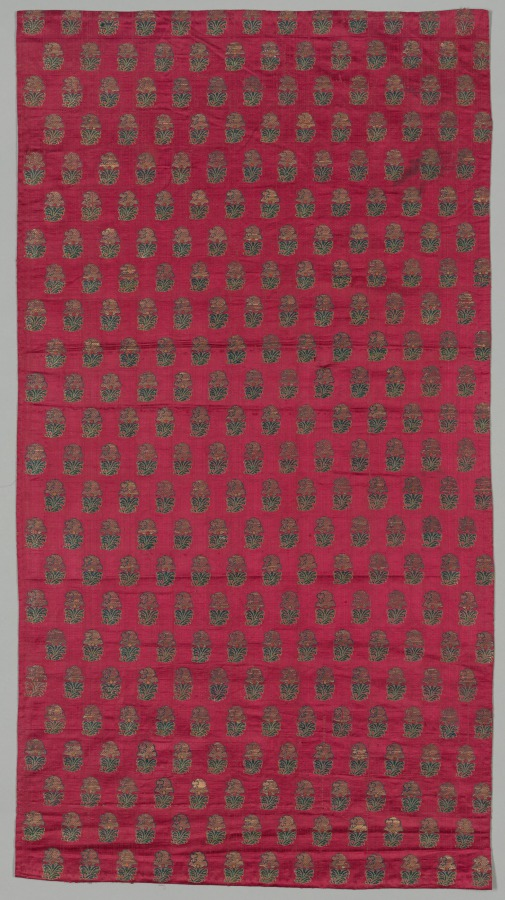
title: Fragment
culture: India, Warangal or Gulbarga, 18th or 19th century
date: 1700s or 1800s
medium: brocade, "himru"; cotton and silk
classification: Textile